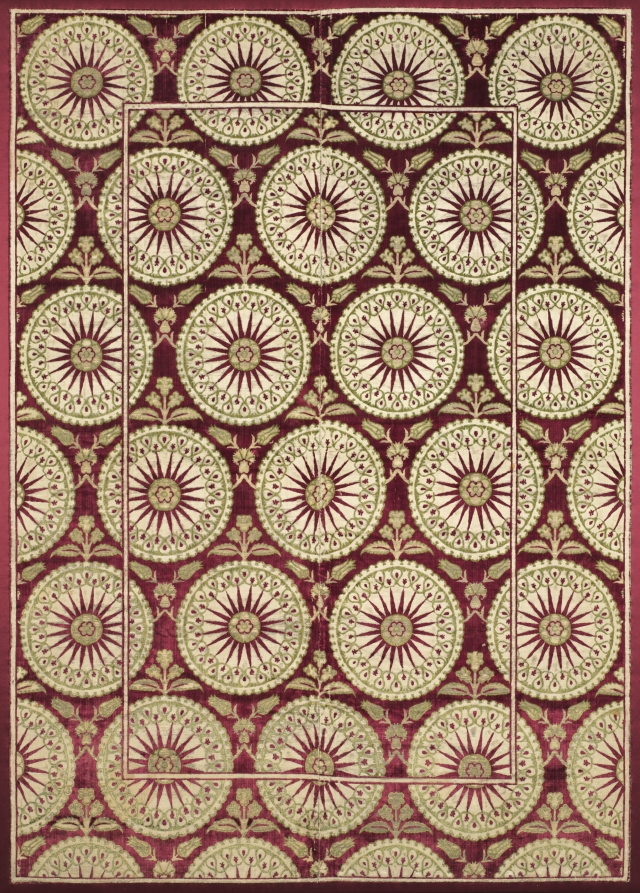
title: Brocaded velvet cover with sunbursts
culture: Turkey, Istanbul or Bursa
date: early 1600s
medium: velvet, brocaded: silk, gilt- and silver-metal thread, and cotton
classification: Textile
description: The rare sunburst pattern contrasts in its boldness with delicate floral motifs; the sunburst’s dynamic rays terminate in small tulips bearing hyacinths that alternate with peacock feathers. Interstitial motifs display the favorite telltale Turkish flora of carnations, tulips, and hyacinths. Quantities of luxury textiles were made for the Ottoman sultans, who were the largest consumers of textiles in the Western world by the mid-1500s and early 1600s. Textiles were lavishly displayed in ceremonies, presented as splendid robes of honor, and visible as furnishing fabrics in the Topkapi Palace in Istanbul where they spoke to the vast power and unfathomable wealth of the Ottoman Empire.